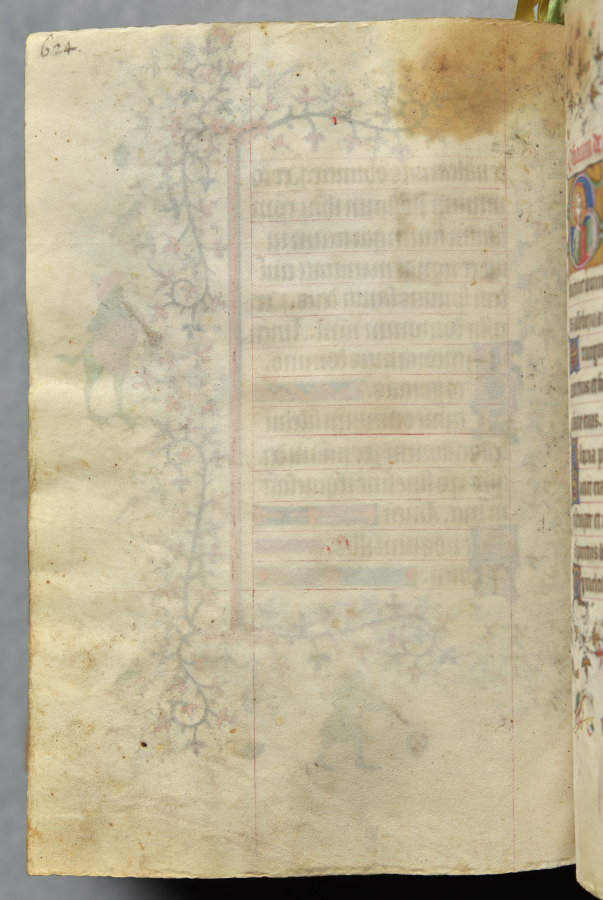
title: Hours of Charles the Noble, King of Navarre (1361-1425): fol. 306v, Text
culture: France, Paris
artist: Master of the Brussels Initials and Associates (French)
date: c. 1405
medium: ink, tempera, and gold on vellum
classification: Bound Volume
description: This precious volume was obviously highly prized by its owner, the French-born King of Navarre, who had his coat of arms painted on no less than twenty folios. Rather than directly commissioning this manuscript from a specific workshop, it seems that Charles the Noble acquired his book of hours -- perhaps ready-made for the luxury market -- while on a trip to Paris in 1404-05. A collaborative effort, six painting styles are evidenced within the pages of this codex, those of two Italians, two Frenchmen, and two Netherlanders. The painter who was responsible for the planning and decoration of the book, and who produced seventeen of the large miniatures, was a Bolognese artist known as the Master of the Brussels Initials. His principal assistant, responsible for most of the borders, was a Florentine who signed his name "Zecho" da Firenze on folio 208 verso.